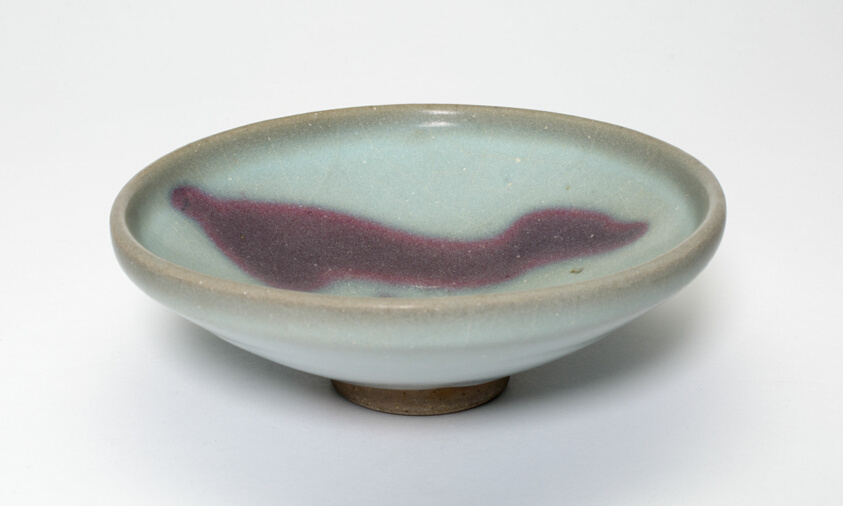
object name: Vessel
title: Bowl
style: Chinese (culture or style)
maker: China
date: Ming dynasty (1368–1644)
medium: Jun ware; stoneware with light blue and purple glaze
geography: China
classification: bowl; stoneware; dish (vessel); asian art; ceramics; vessel